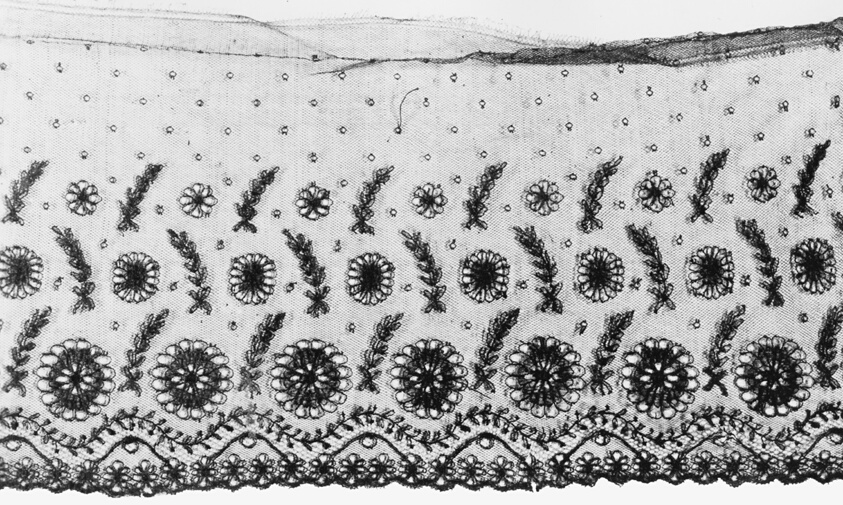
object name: Textile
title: Flounce (Incomplete)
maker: England or France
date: 1875/1900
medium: Silk, Leavers machine lace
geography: England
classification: textile; lace - machine